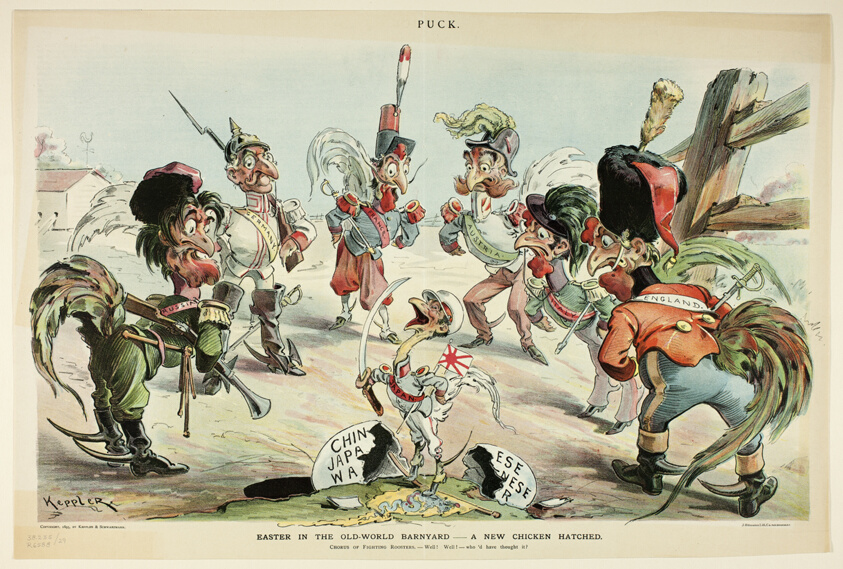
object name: Print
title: Easter in the Old World Barnyard, from Puck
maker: Joseph Keppler (American, 1838-1894)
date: 1895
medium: Color lithograph on newsprint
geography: United States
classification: lithograph; print; prints and drawing